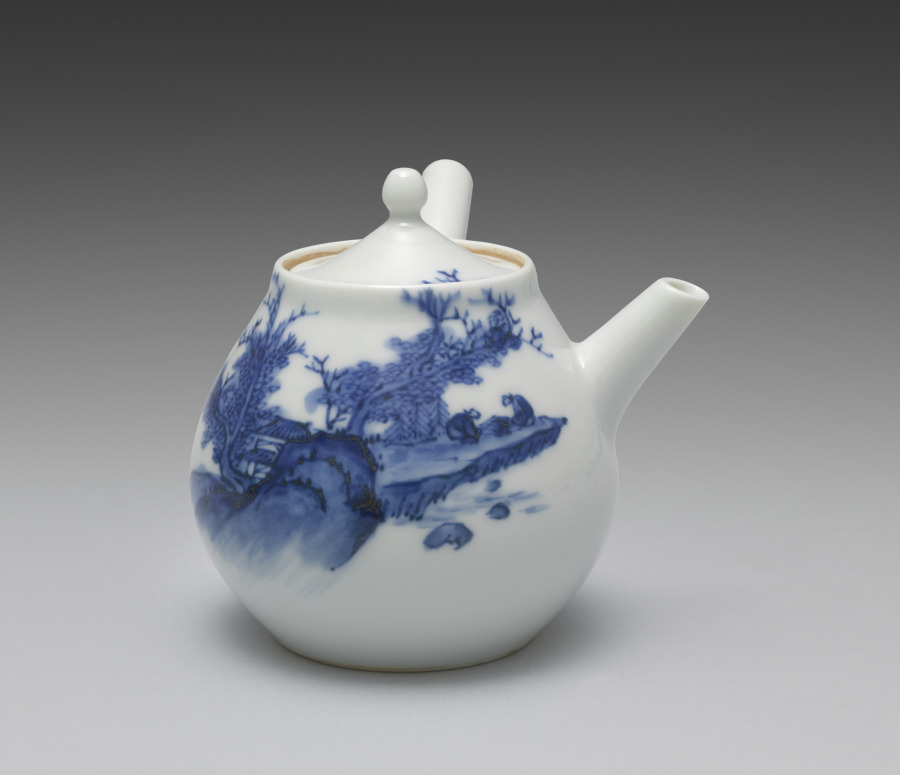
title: Teapot from Tea Set with Chinese Landscape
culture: Japan, Meiji period (1868–1912)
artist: Seifū Yohei III (Japanese, 1851–1914)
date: 1893–1914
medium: Porcelain with underglaze blue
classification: Ceramic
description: This tea set with idyllic lakeside Chinese landscapes has a side-handled pot called a kyūsu, used for steeping, straining, and serving tea. Unlike some others, this set also has a yuzamashi, a container used to cool boiled water to just the right temperature for the best flavor when steeping. Seifū Yohei III’s painting teacher, Tanomura Chokunyū (1814–1907), made a visual record of famous sencha events that shows how these kinds of porcelains fit with objects such as a stove and kettle to form a complete set of utensils for tea preparation, and with ensembles of decorative objects meant to inspire creativity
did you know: The teapot depicts two friends playing a board game on a promontory beyond a two-storied residence, while another figure comes across the entry bridge bearing bags of provisions, hung from the ends of a pole balanced across his shoulders.